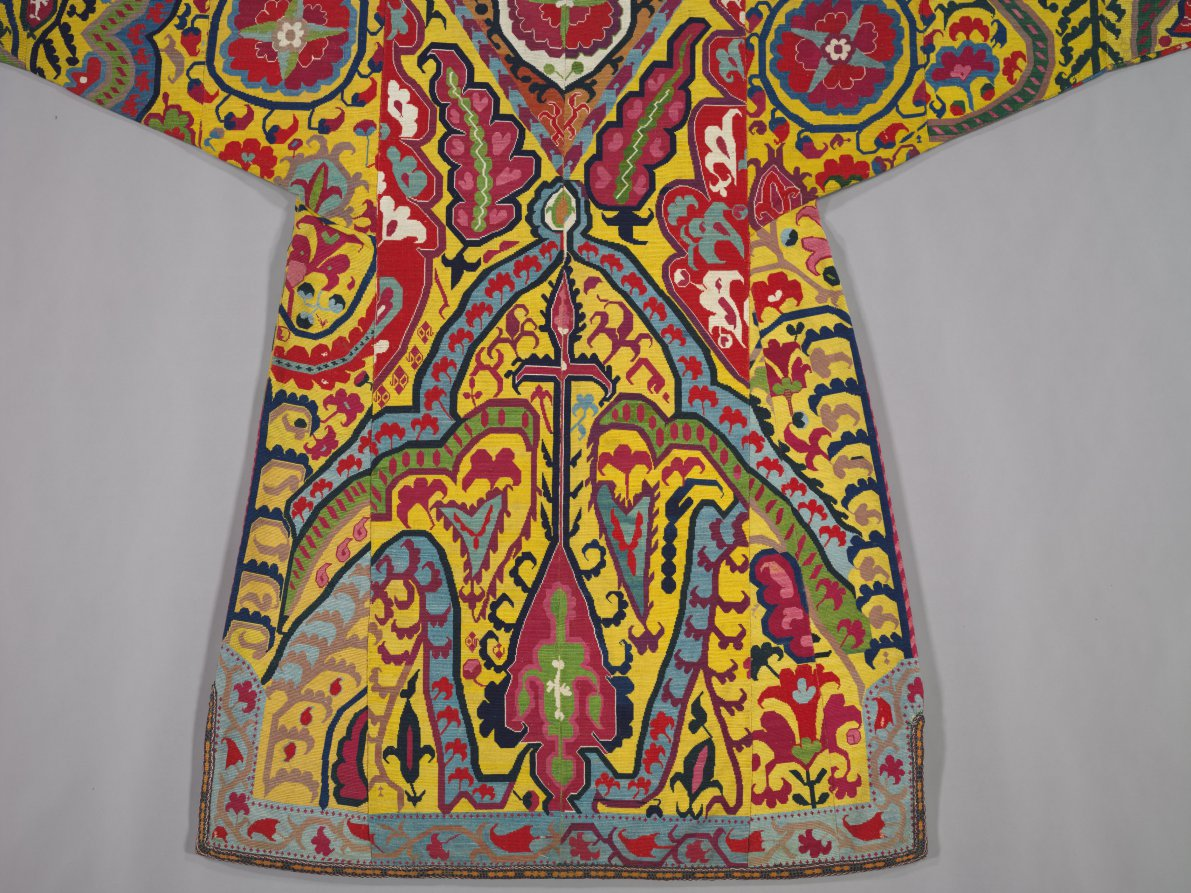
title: Man's surcoat (khalat)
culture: Uzbekistan, Shahr-i Sabz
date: late 1800s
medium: Silk: embroidery, cross-stitch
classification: Garment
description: Prestigious men’s surcoats embellished with designs such as this dramatic decoration in cross-stitch were among the most elaborate silk-thread embroidered garments in Central Asia. In a flamboyant style, large palmettes framed by split palmette leaves dominate with quartered rosettes and smaller flora on a brilliant yellow ground. Foliate vines enhance the edge along the front center opening, hemline, and cuffs. It is lined with an ikat of cypress trees and finger-looped trim. The style and technique represent professional work from Shahr-i Sabz, south of Samarkand. The pattern was drawn on the cotton ground cloth of the surcoat, then disassembled for stitching, and finally reassembled—revealed by severed and misaligned motifs plus mismatched colors.